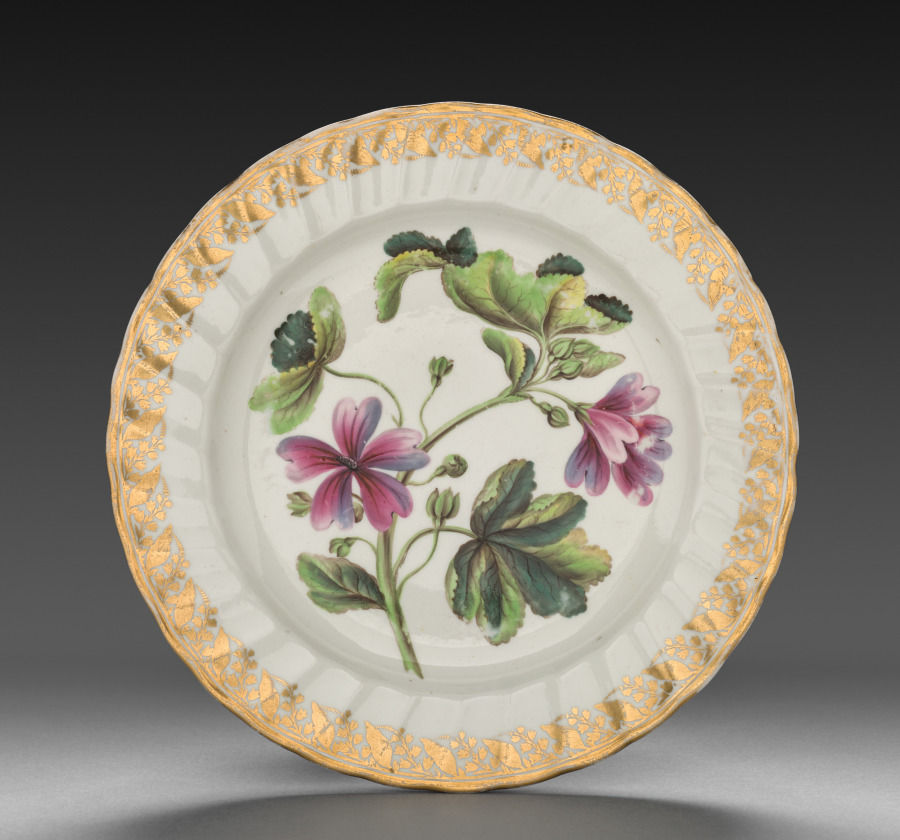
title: Plate from Dessert Service: Marsh Mallow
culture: England, Derby, 18th century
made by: Derby (Crown Derby Period) (British)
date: c. 1800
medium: porcelain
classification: Ceramic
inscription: inscribed in blue on back: [Althaea?] Marsh Mallow./crown/crossed batons and dots/D/115.